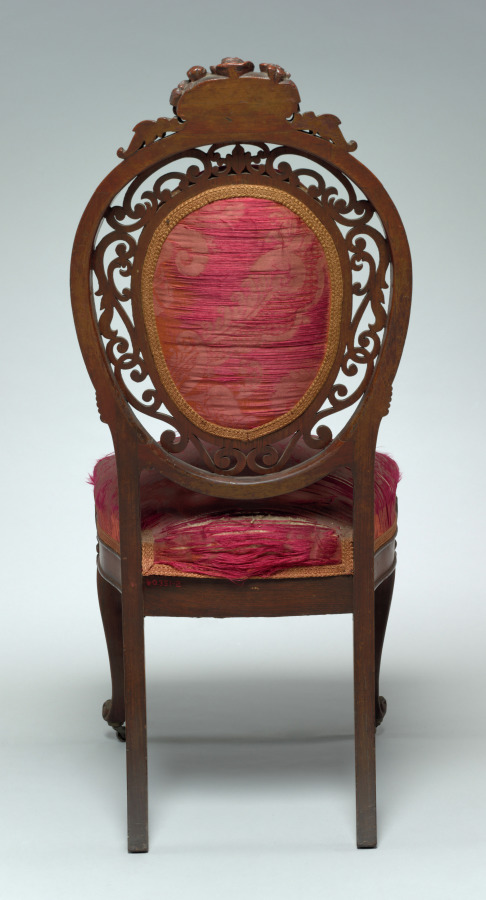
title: Side Chair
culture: America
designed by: Charles H. White (American, 1796–1876)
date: c. 1855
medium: rosewood, red silk damask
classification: Furniture and woodwork